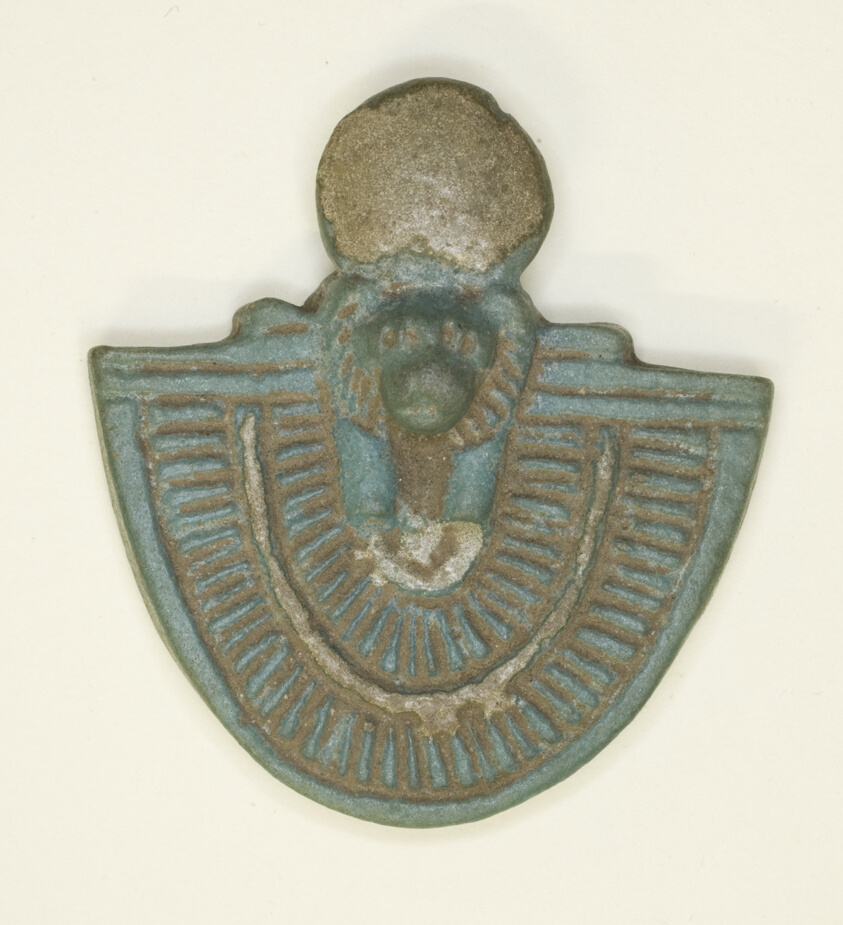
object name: Costume and Accessories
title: Pectoral Amulet of the Goddess Bastet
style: late period (egyptian)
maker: Egyptian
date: Late Period, Dynasty 26–30 (664–343 BCE)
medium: Faience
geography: Egypt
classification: amulet; ceramics; jewelry; ancient art; costume; faïence (composite material)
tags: goddesses